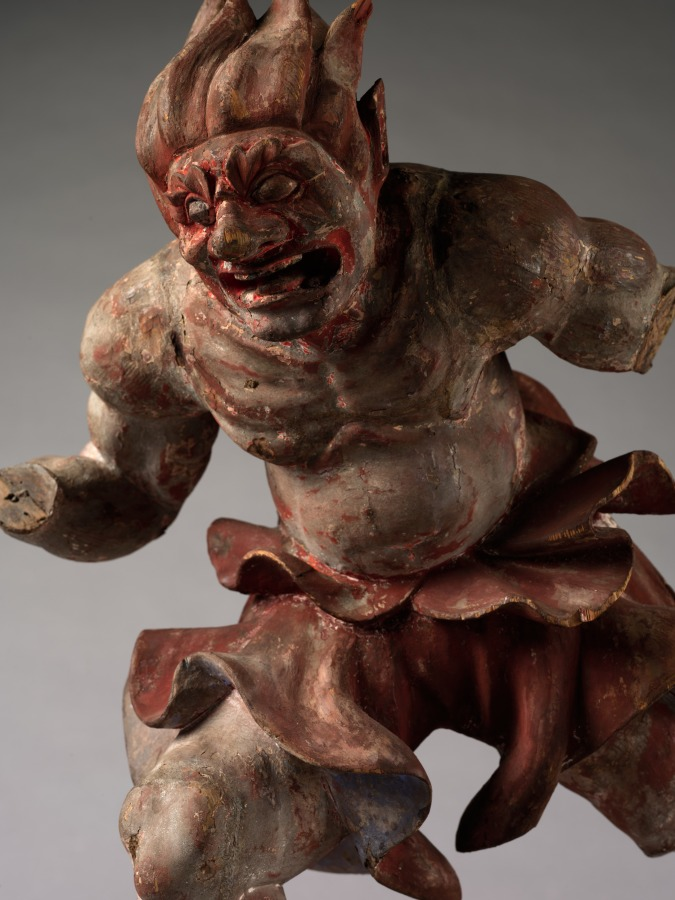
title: Thunder God (Raijin)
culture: Japan, Kamakura period (1185–1333)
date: 1300s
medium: wood with traces of gesso and red and black pigment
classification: Sculpture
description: The Thunder (Raijin) and Wind (Fujin) gods first appeared in early Buddhist art in China and Japan and were based on the popular imagery in India that was derived from the life of the historical Buddha, Shakyamuni. They were shown among a group of demon-monsters flying through the sky above the meditating Shakyamuni in an attempt to frighten away his concentration. Raijin is surrounded by a ring of small drums struck by a stick held in his hand so that he is always accompanied by a thunderous noise. A metal clasp protruding from this sculptures' back indicates that a ring of drums was once attached to the Cleveland Raijin. The matching sculpture, Fujin, is in the Fukuoka Art Museum in Japan.